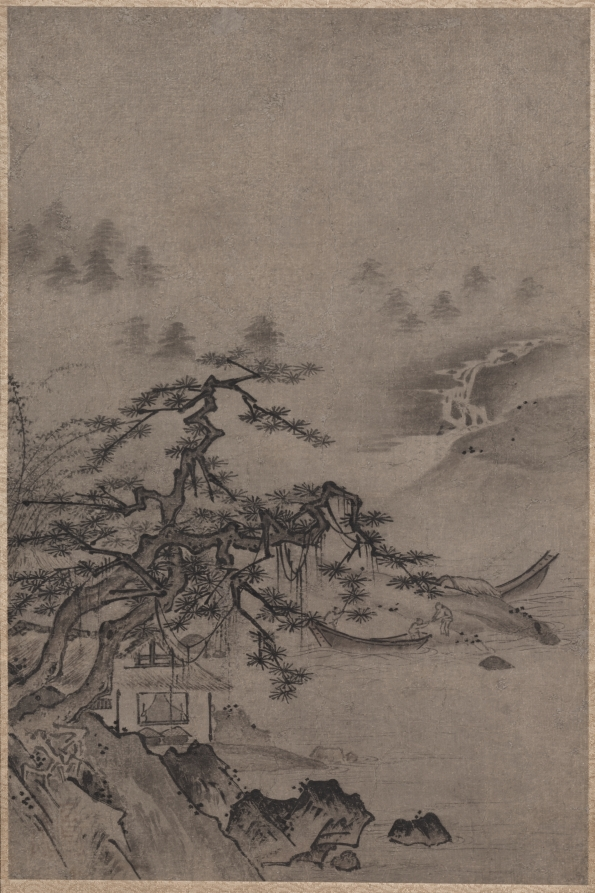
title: Thatched Hut by Water's Edge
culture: Japan, Muromachi period (1392–1573)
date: c. 1500–1573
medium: hanging scroll; ink on paper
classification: Painting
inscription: seal: 龍杏 ?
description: Muromachi period (1392–1573) artists in Japan were keenly interested in Korean and Chinese culture. Paintings from the continent were avidly collected, studied, and copied for specific techniques and effects. Most painters, however, never had the opportunity to actually travel abroad. This painting presents a typical, idealized image of a Chinese scholar's retreat in the countryside. The misty background, however, brings a decidedly Japanese element to the composition. Japanese painters had long been interested in portraying the seasons and in suggesting the special atmosphere of a place.